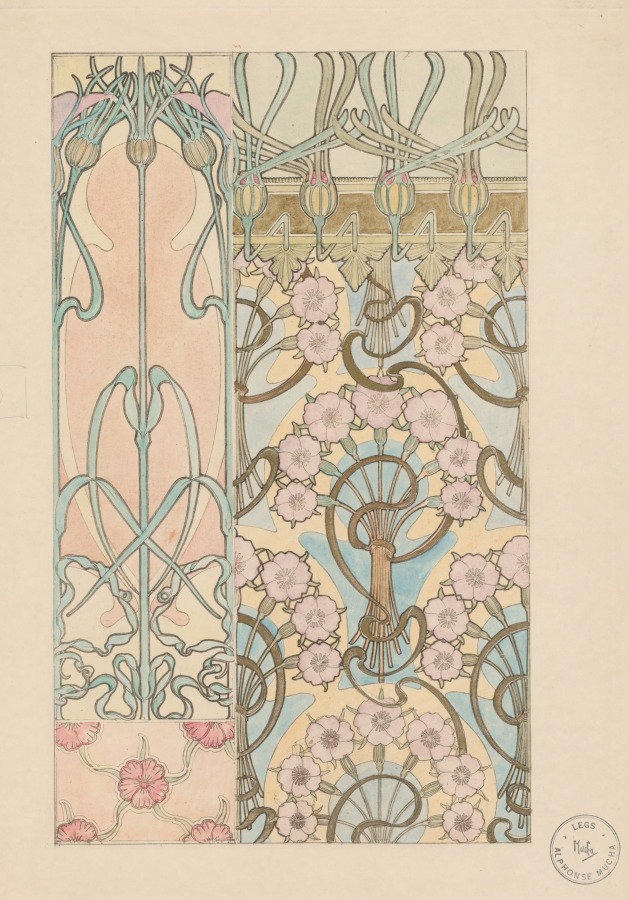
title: Ornament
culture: Czechoslovakia, 20th century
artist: Alphonse Mucha (Czech, 1860–1939)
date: 1901–2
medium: metal relief and watercolor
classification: Print